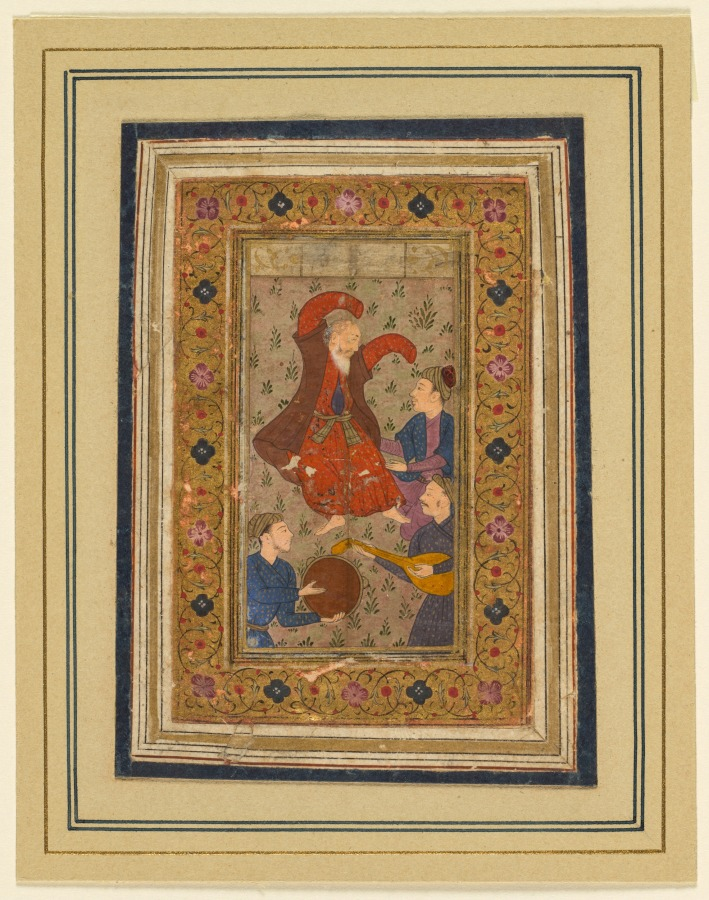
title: A dancing dervish and three musicians, from a Divan (Collected Poems) of Urfi (Persian, 1555–1591)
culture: India, Muhammadpur, Bijapur, Deccan, 17th century; made for Sultan Muhammad Adil Shah (r. 1627–56)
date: 1637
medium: Gum tempera and gold on paper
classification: Painting